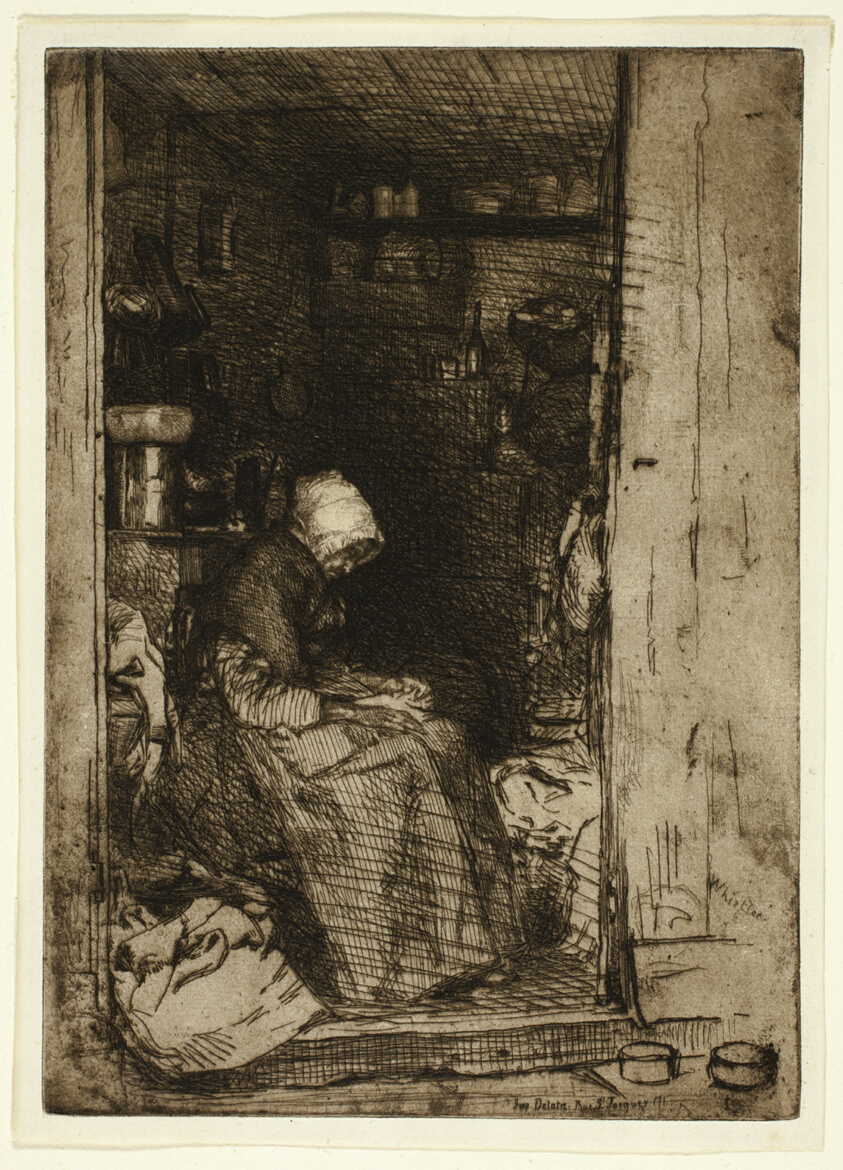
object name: Print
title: La Vieille aux Loques (The Old Woman with Rags)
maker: James McNeill Whistler (American, 1834-1903)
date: 1858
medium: Etching and drypoint in brown ink on ivory laid paper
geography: United States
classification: etching; print; prints and drawing; paper; drypoint